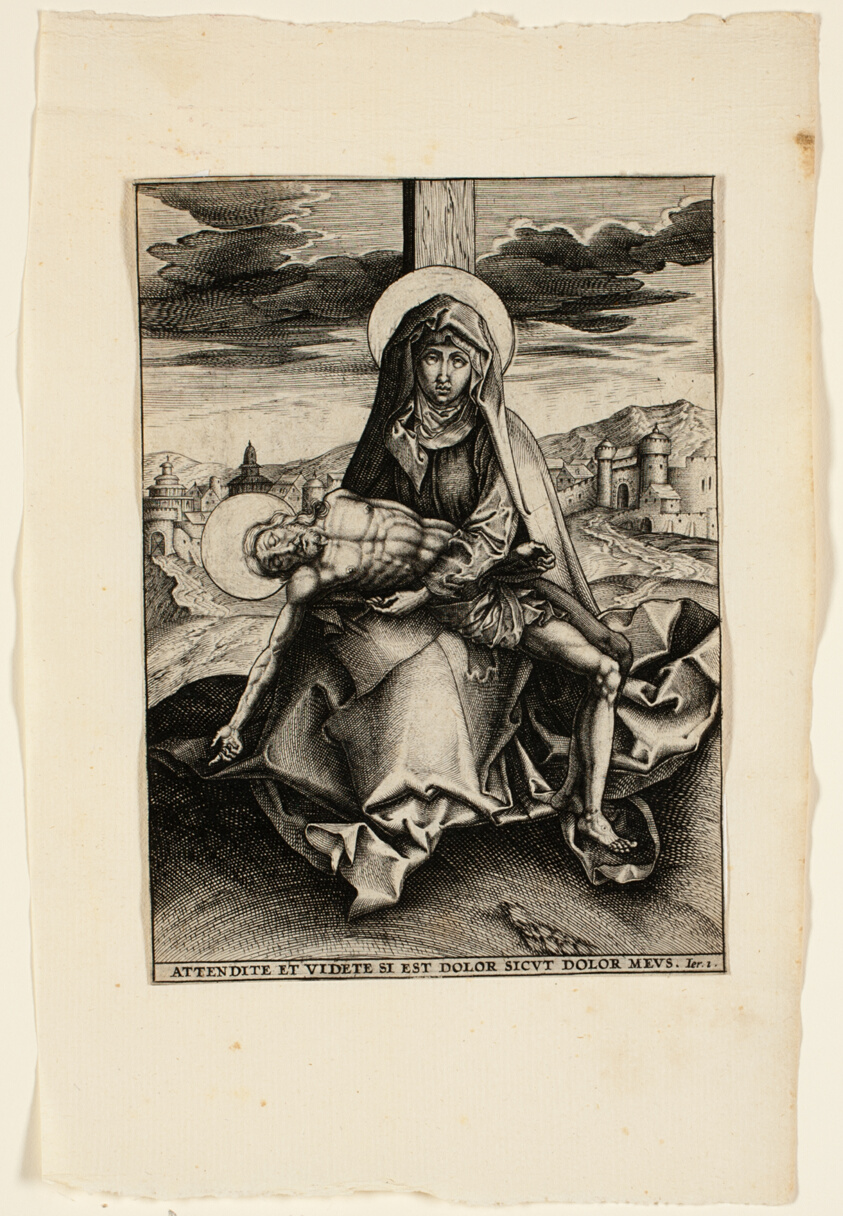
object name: Print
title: Pietà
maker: Unknown artist; Netherlandish, 16th century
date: c. 1550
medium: Engraving with etching in black on cream laid paper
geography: Netherlands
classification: engraving; paper; print; prints and drawing